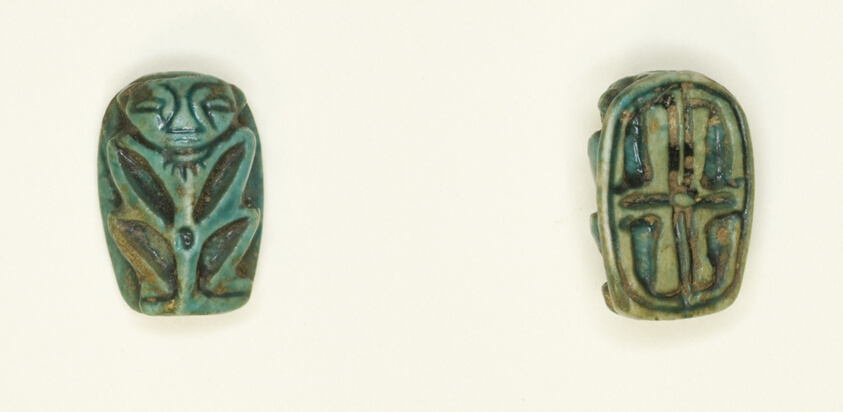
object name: Costume and Accessories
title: Scaraboid: Dwarf Figure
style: new kingdom, egyptian, ancient, ramesside period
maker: Egyptian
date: New Kingdom, Dynasties 19–20 (about 1295–1069 BCE)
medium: Glazed steatite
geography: Egypt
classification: scaraboids; amulet; ancient art; costume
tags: deities, cobras, gods (deities)